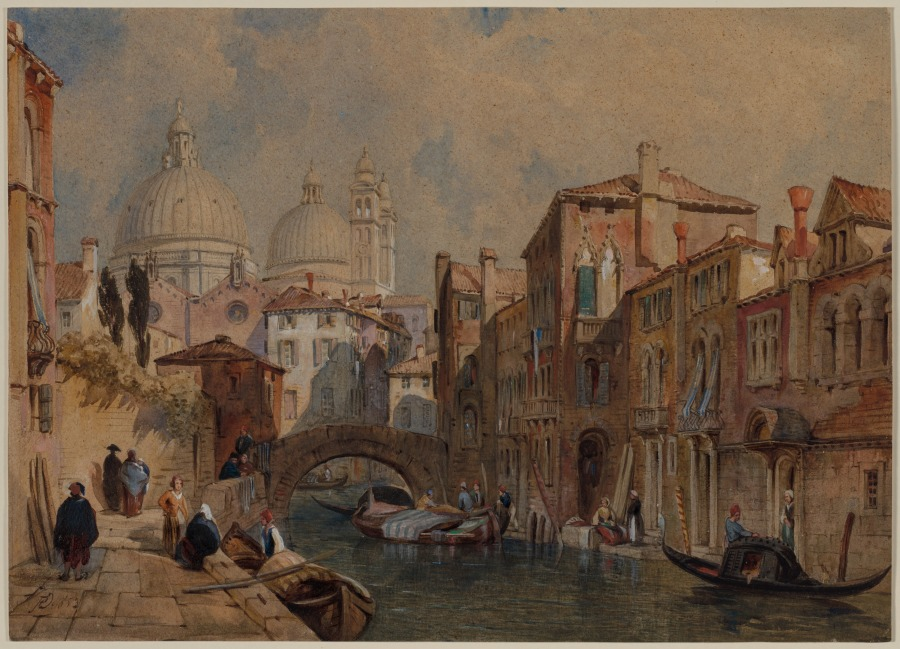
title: View of Venice: The Dome of Santa Maria della Salute Seen from the Rear of the Da Mula Palace, looking Eastward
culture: England, 19th century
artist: Frank Dillon (British, 1823–1909)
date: 1853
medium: watercolor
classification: Drawing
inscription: lower left, in watercolor: FD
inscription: [artist's monogram] 1853